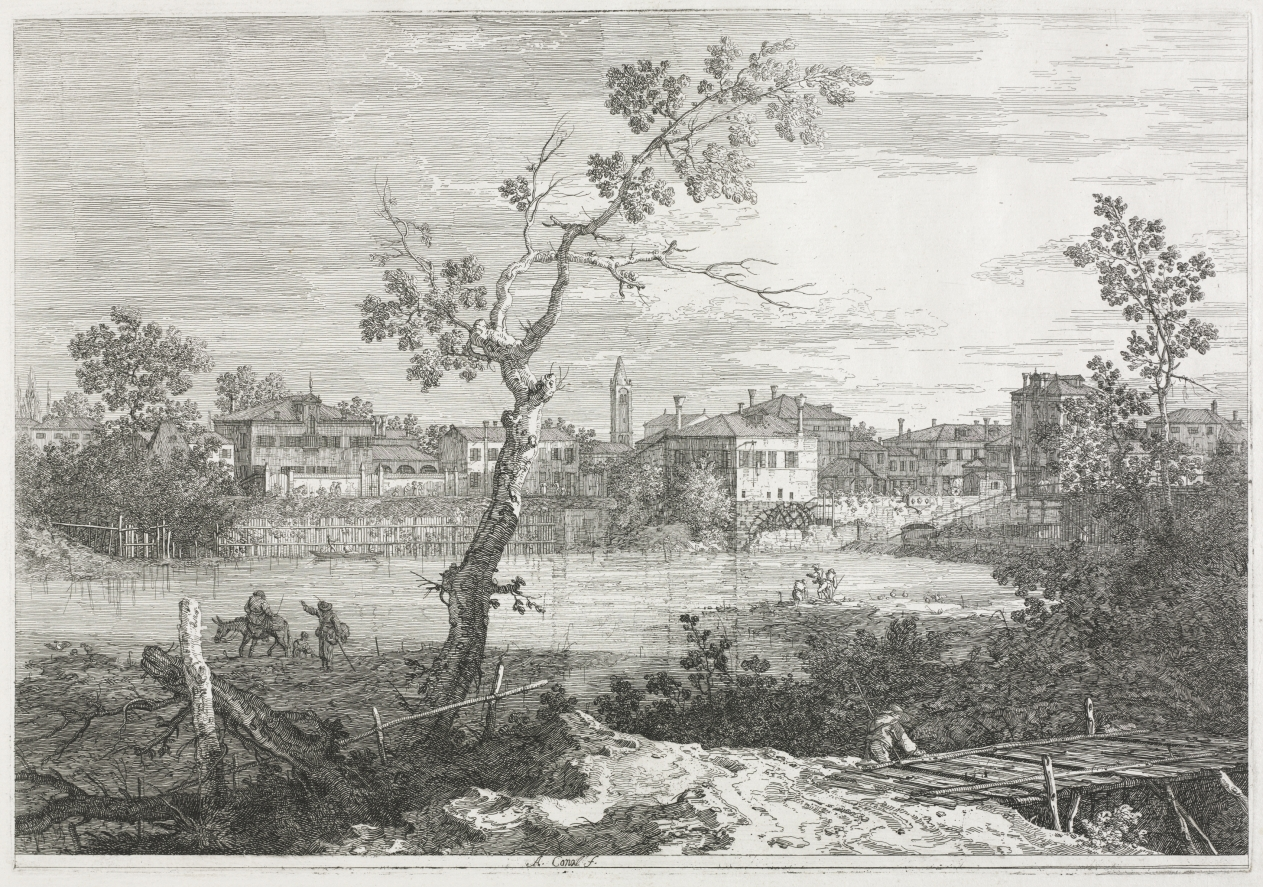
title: Views: View of Burano, a Town on an Island in the Venetian Lagoon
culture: Italy, Venice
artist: Antonio Canaletto (Italian, 1697–1768)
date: 1735–1746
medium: etching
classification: Print